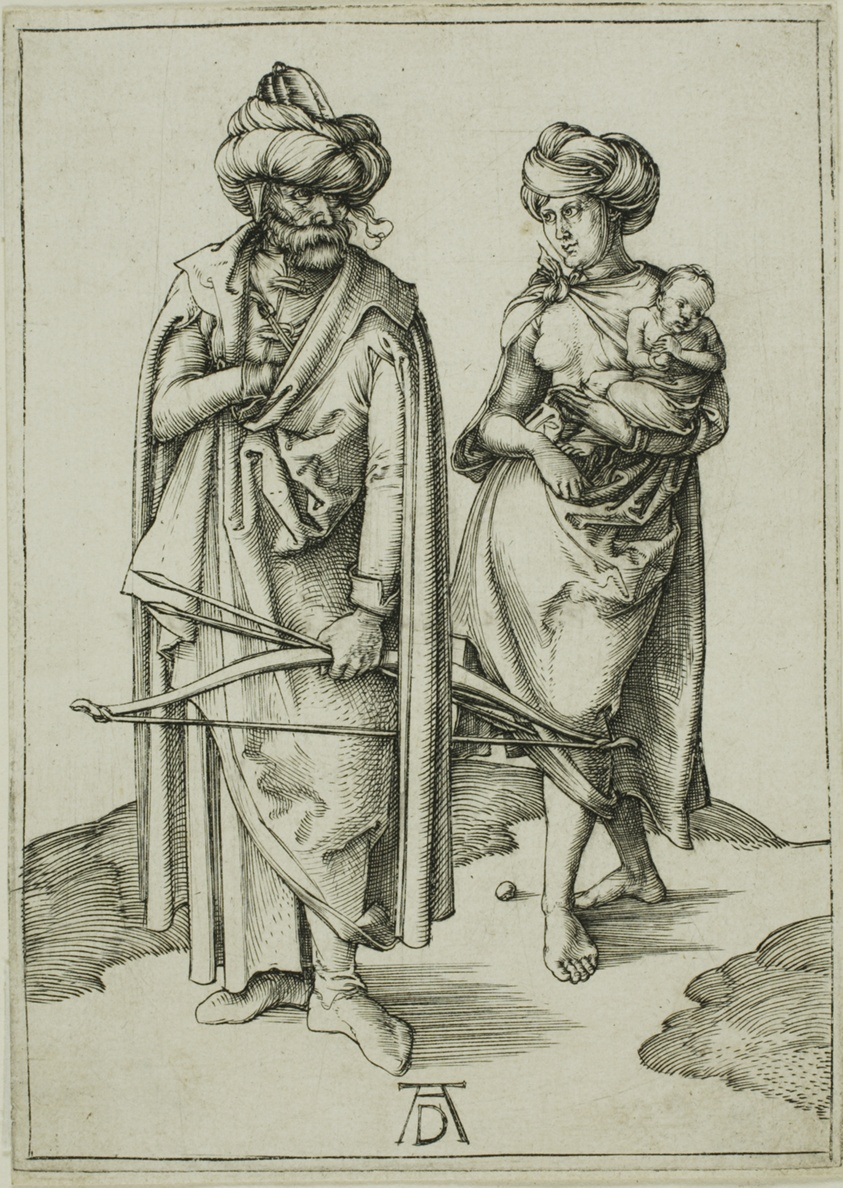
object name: Print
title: Oriental Family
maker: Albrecht Dürer (German, 1471-1528)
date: c. 1496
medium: Engraving in black on ivory laid paper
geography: Germany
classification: engraving; print; prints and drawing; paper